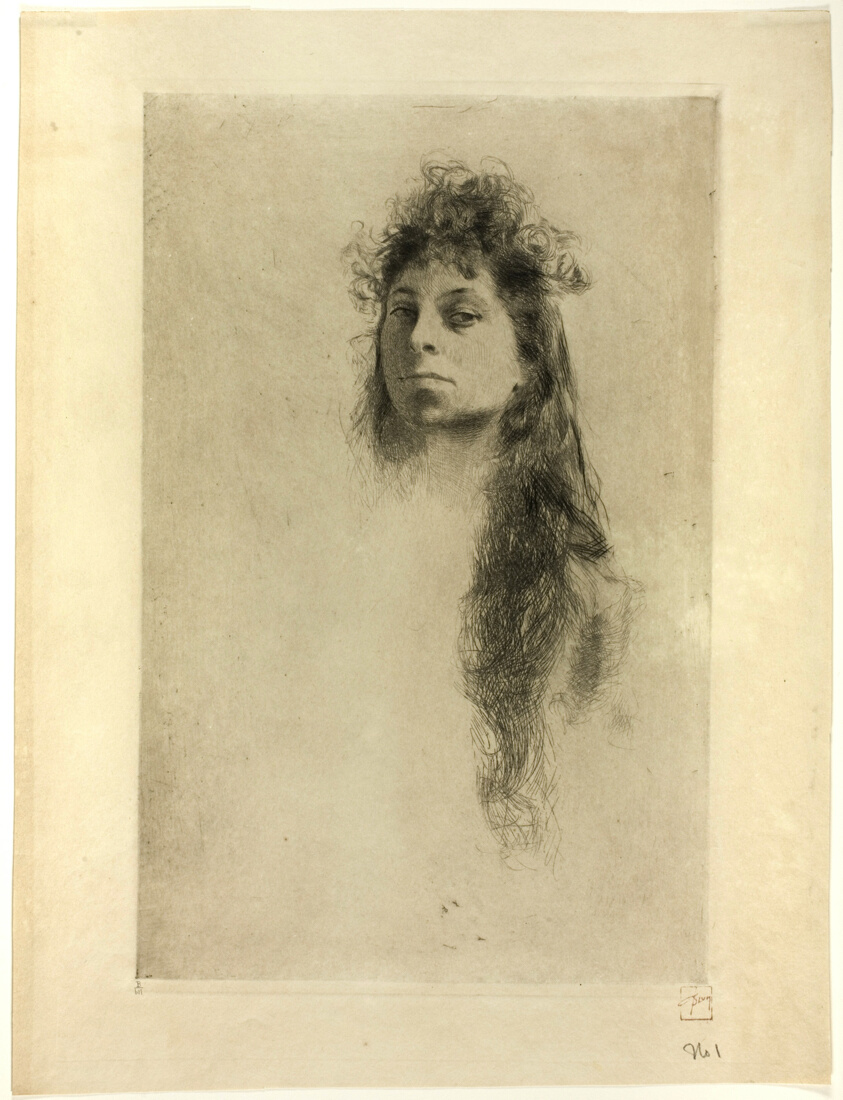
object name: Print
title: Head of a Girl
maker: Robert Frederick Blum (American, 1857-1903)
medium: Etching on cream wove paper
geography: United States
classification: drypoint; print; prints and drawing